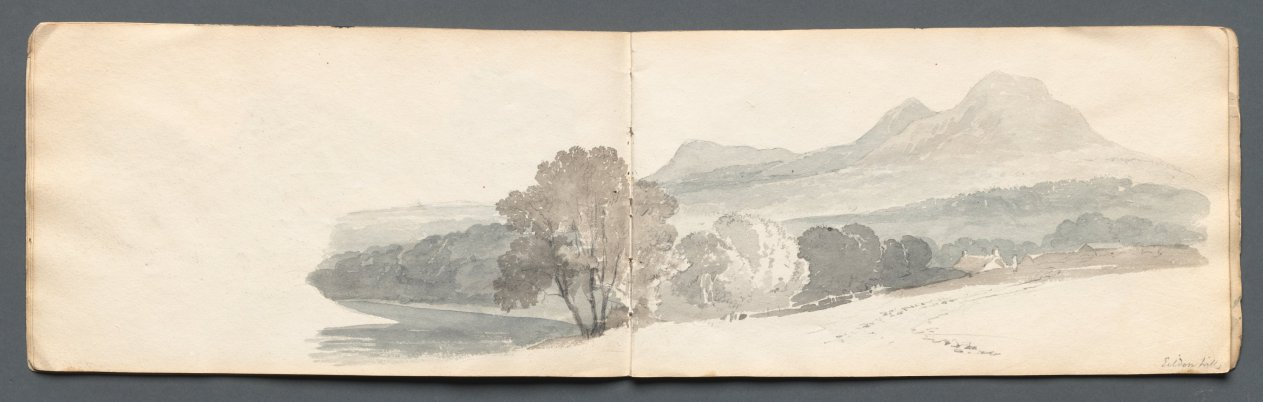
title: Sketchbook: Eildon Hills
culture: England, 19th century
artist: Samuel Prout (British, 1783–1852)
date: 1814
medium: graphite with gray and brown wash on two pages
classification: Bound Volume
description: John Ruskin (also in this gallery) admired Prout’s strength as a draftsman. Like the topographical watercolorists of the 18th century, Prout emphasized form over color in his watercolors, as is evident in the monochromatic, delicate English views in this sketchbook.